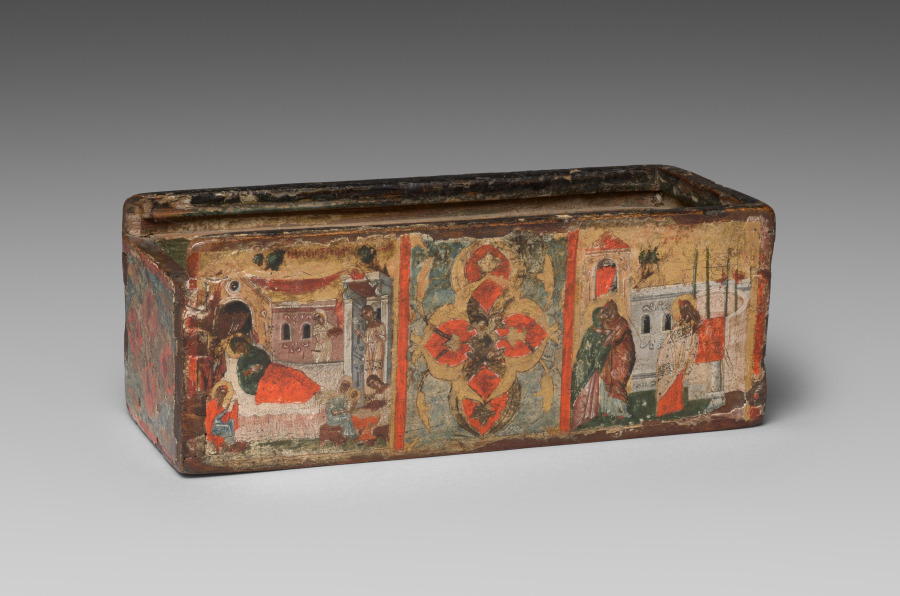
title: Reliquary Box with Scenes from the Life of John the Baptist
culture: Byzantium, Constantinople, late Byzantine period, 14th century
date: 1300s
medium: tempera and gold on wood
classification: Wood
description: John the Baptist--the first person to recognize Christ as the promised savior and the one who baptized him in the Jordan River--was one of the Byzantine Empire’s most revered saints. This box shows four scenes from the saint’s life: John’s martyrdom, Christ’s baptism, John’s birth, and the announcement of his birth to his parents. It probably once housed one of the saint’s relics; several were kept in churches and monasteries in Constantinople, including fragments of his skull and right arm and locks of his blood-clotted hair.